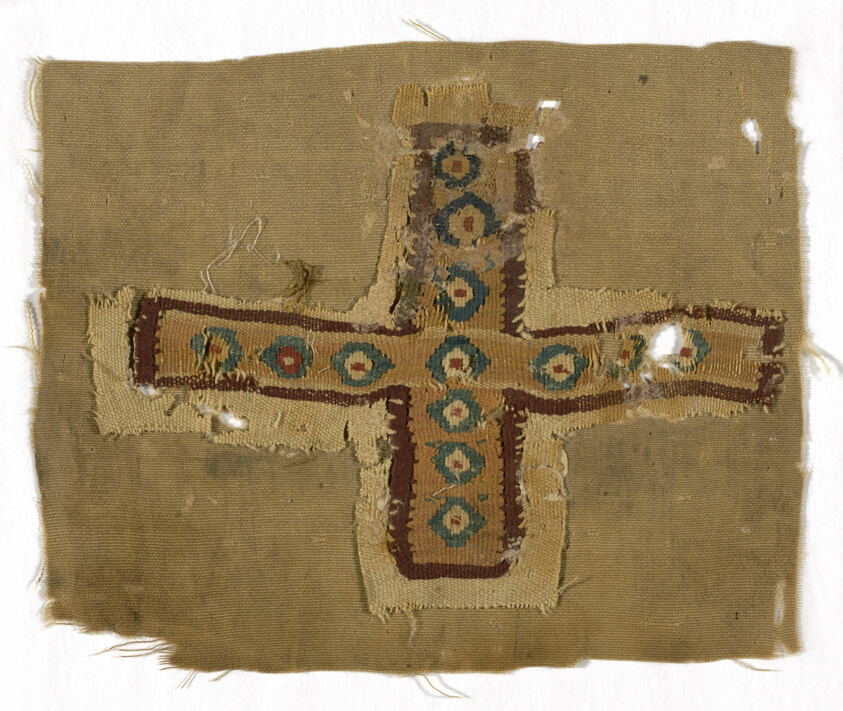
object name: Textile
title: Cross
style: roman period (egyptian)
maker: Coptic (Egypt)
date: Roman period (30 B.C.– 641 A.D.), 5th/6th century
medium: Wool, tapestry weave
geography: Egypt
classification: textile; weaving